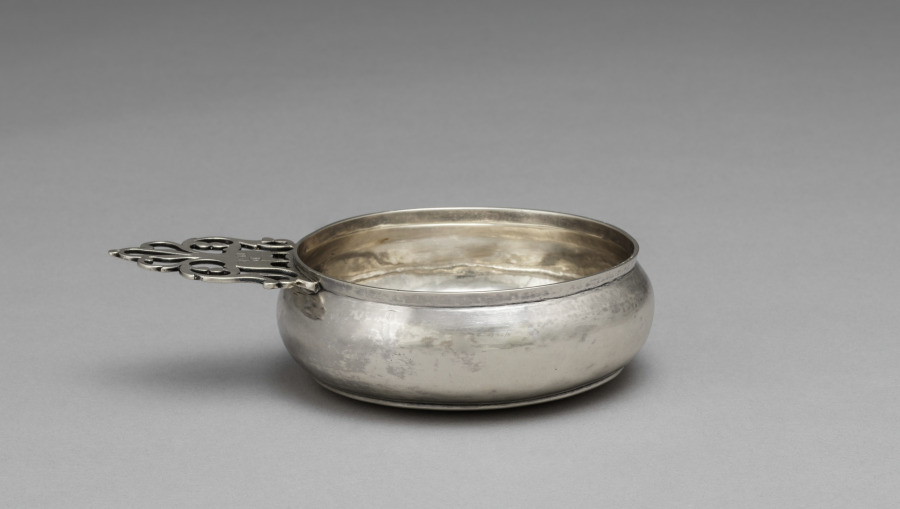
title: Porringer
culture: America, Massachusetts, Marblehead, 18th century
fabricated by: William Jones (American, 1694–1730)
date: 1725–1730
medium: silver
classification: Silver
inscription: engraved "D" over "H * A" in cross-hatched block initials on top of handle.